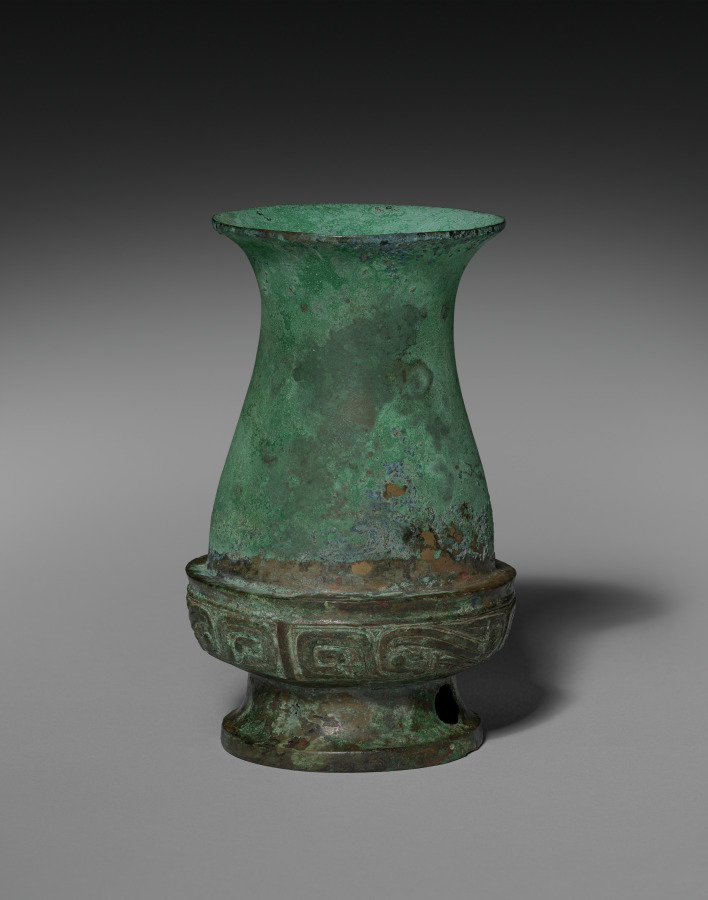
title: Wine Vessel (Hu) (lid)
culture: China, Western Zhou dynasty (c. 1046–771 BCE)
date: c. 1000–900 BCE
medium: bronze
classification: Metalwork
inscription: inscription inside top (cup): 事从作壺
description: This tall, slender bronze wine vessel, called a hu, has three bands of ornamentation: one above the foot, one around the neck, and one on the cover. Stylized birds or phoenixes are in the band around the neck, while the band on the cover and foot feature geometric dragons. The dragon and the phoenix may represent the Yin and Yang and would be equally appropriate on a bronze of either secular or religious purposes. It likely held liquids like wine at festive banquets or religious ceremonies.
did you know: When inverted, the cover forms a cup.